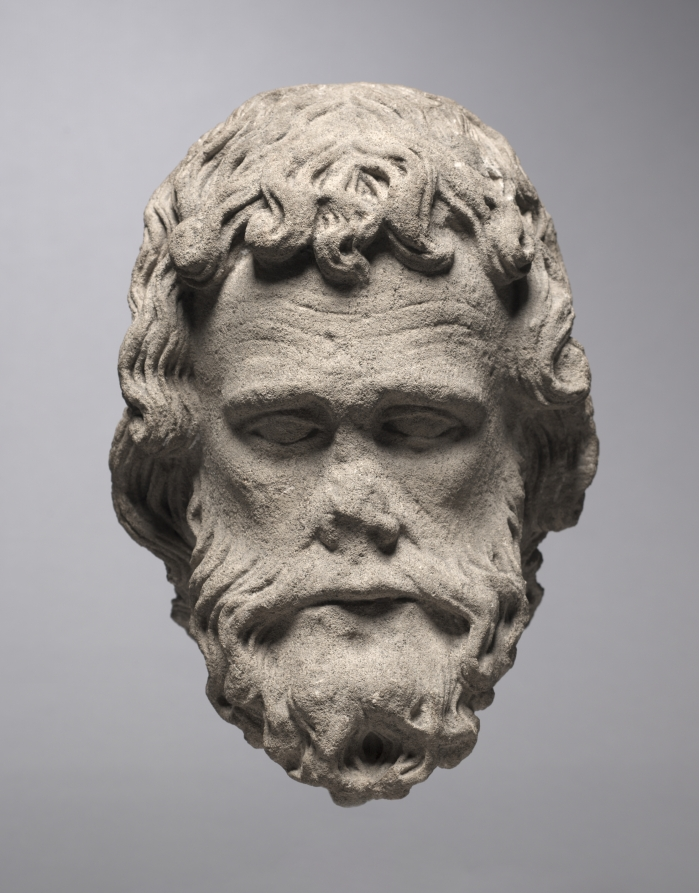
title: Head of an Apostle from the South Portal of the Cathedral of Thérouanne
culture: Northern France (Pas-de-Calais), Thérouanne, 13th century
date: c. 1235–1240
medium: oolitic limestone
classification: Sculpture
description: These monumental stone heads are among the substantial known remains of the sculptural program of Thérouanne’s cathedral, which was razed by Emperor Charles V of Spain in June 1553. These heads were found in a wall of rue Ste. Croix in the town of Saint Omer (a short distance to the north) in January 1923. This group of sculptures from the gable of the south portal of Thérouanne, which includes a stylistically related Christ as Judge, is recorded to have been moved to the Cathedral of Saint Omer in 1554. With their deeply carved wavy hair, curly beards, wrinkled foreheads, and ponderous facial features, these imposing heads—even in their now fragmentary and weathered state—attest to the powerful monumentality of the stone sculpture covering French church facades of the Gothic period.